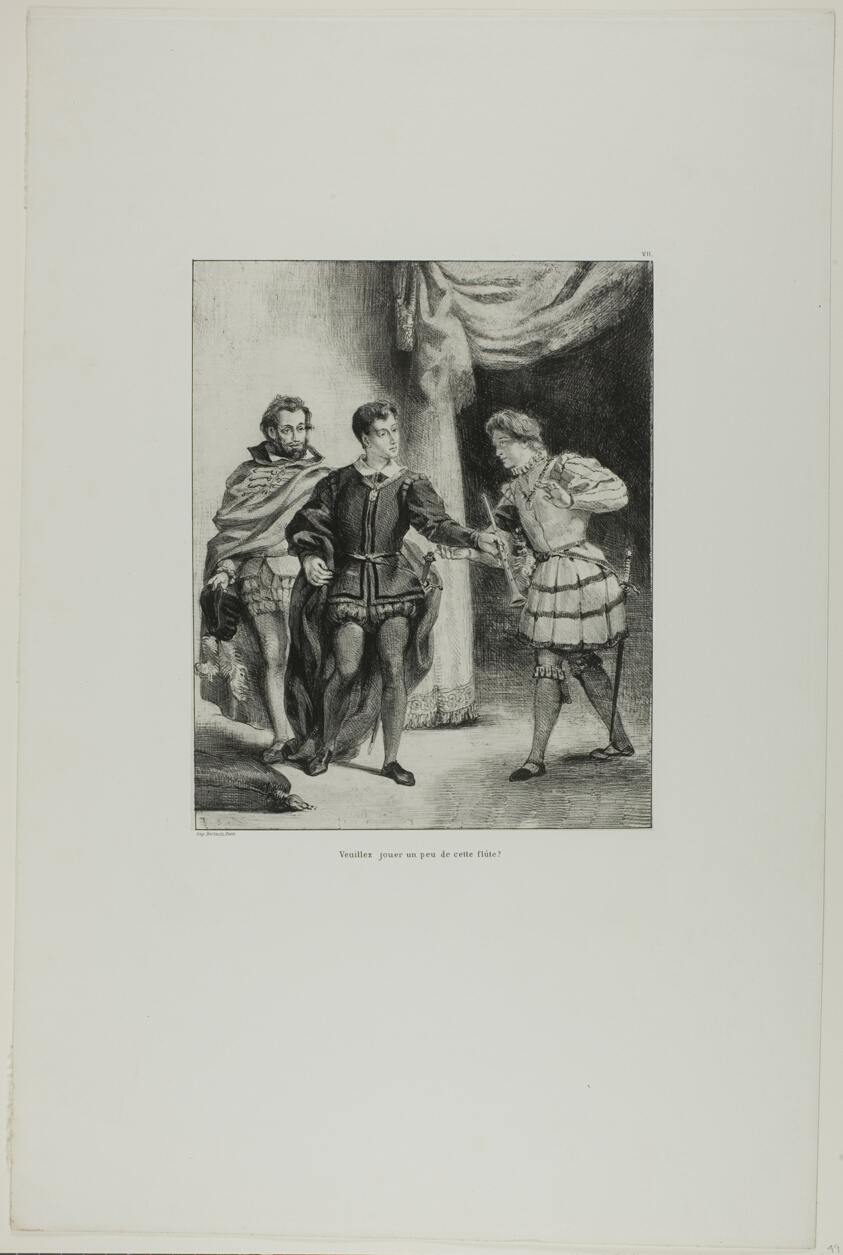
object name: Print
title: Hamlet and Guildenstern, plate 6 from Hamlet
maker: Eugène Delacroix (French, 1798-1863)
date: 1835–43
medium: Lithograph in black on off-white China paper laid down on white wove paper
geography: France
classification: lithograph; print; prints and drawing